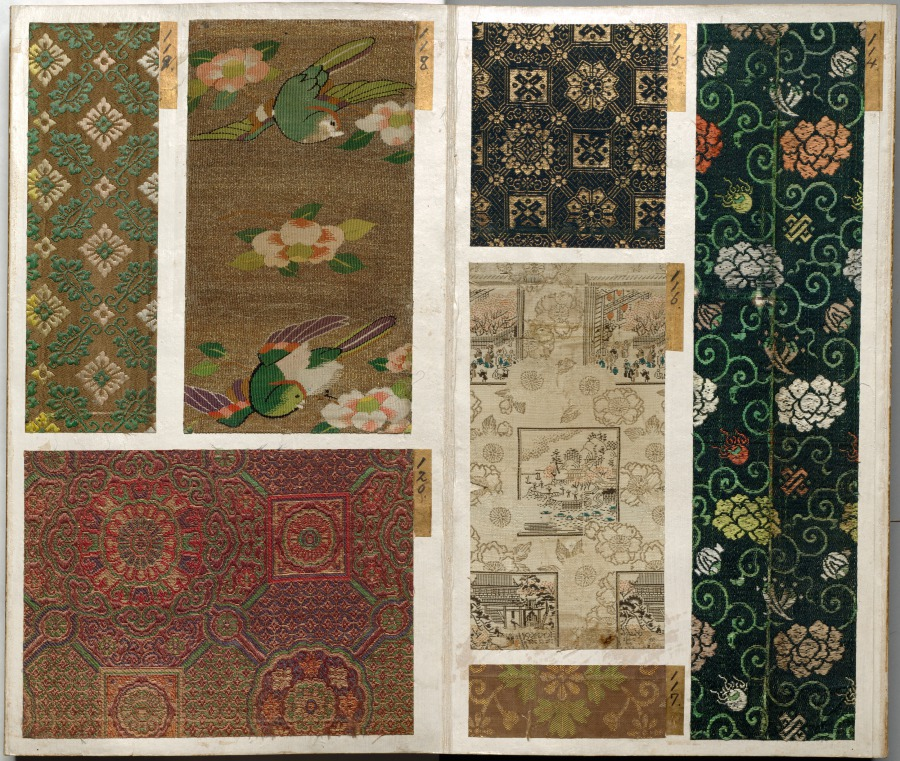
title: Album of Textile Samples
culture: Japan, Edo period (1615–1868)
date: 1600s-1700s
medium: silk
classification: Textile